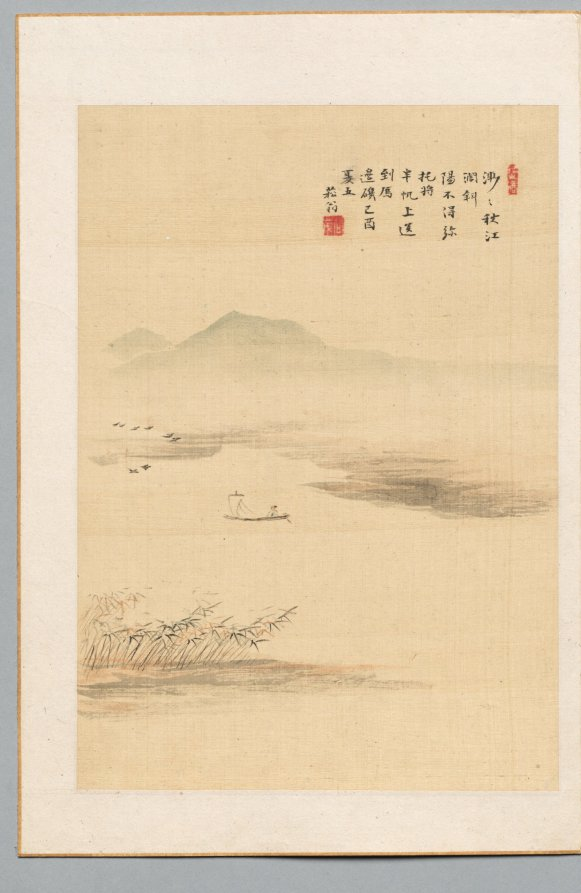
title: Autumn River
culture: Japan, Edo period (1615–1868)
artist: Nukina Kaioku (Japanese, 1778–1863)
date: 1849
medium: leaf from a pair of albums; ink and light color on paper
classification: Portfolio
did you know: Nukina Kaioku was one of the three great calligraphers of the final years of the Edo period (1615–1868), known as the "Three Brushes of the End of the Military Government (Bakumatsu Sanpitsu)."